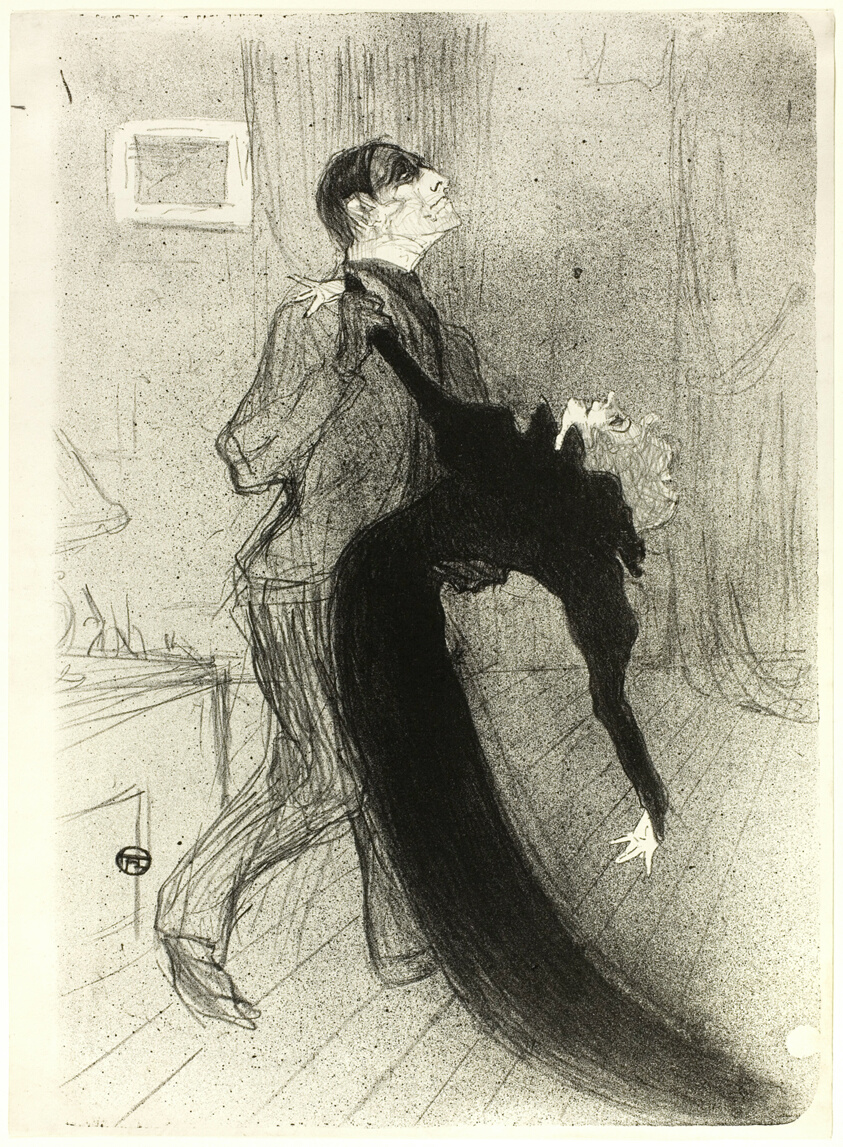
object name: Print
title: The Fainting Fit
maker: Henri de Toulouse-Lautrec (French, 1864-1901)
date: 1894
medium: Lithograph on cream wove paper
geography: France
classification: lithograph; print; prints and drawing